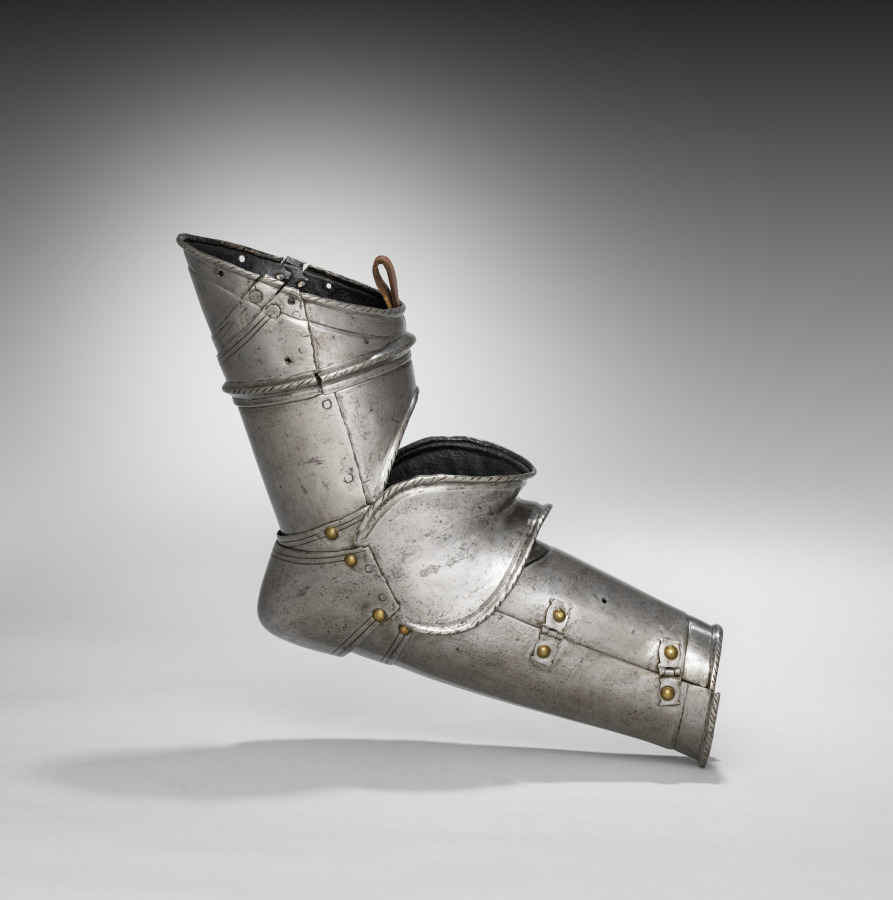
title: Proper Left Arm (Vambrace, Rerebrace and Couter)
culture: South Germany, 16th century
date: c. 1560–1580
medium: steel, leather straps, brass rivets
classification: Arms and Armor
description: This armor was developed for the joust-a sporting combat between two mounted contestants. Although all of the elements of this armor date from the same period, they are not all from the same suit. This armor is thus called "composed." It also shows the asymmetry of jousting armor. The participants rode along a wall-like barrier known as a "tilt" with their left sides facing one another. Consequently, armor on that side of the body had to be thicker. Note the large plate (grandguard) over the left shoulder for extra protection. Also, the breathing holes in the helmet were placed on the right side (farthest from an opponent's lance) to avoid injuries from splinters. The bracket attached to the right breastplate is called the lance-rest, a shock-absorbing support designed to accommodate the lance when "couched" under the right armpit.